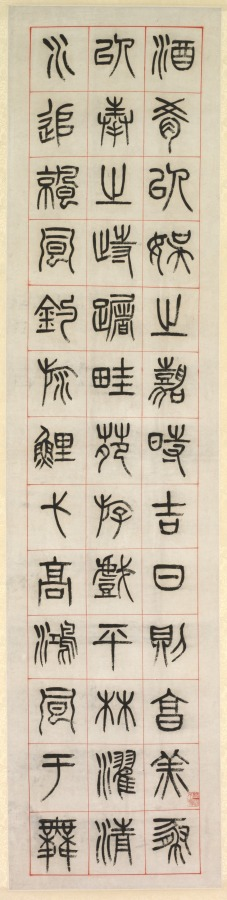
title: On Happiness, Calligraphy in Seal Script Style (zhuanshu)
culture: China, Changsu, Qing dynasty (1644-1911)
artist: Yang Yisun (Chinese, 1813–1881)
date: 1871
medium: hanging scoll, ink on paper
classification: Painting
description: Yang Yisun transcribed this ancient text on six narrow scrolls, starting at the top right and ending at the bottom left. Yang emphasizes the text’s historic nature by using the seal script style found on stone steles and bronze vessels. On Happiness features reflections of a scholar on a leisurely life in the countryside, composed by Han dynasty official Zhongchang Tong, who died the year the Han dynasty collapsed (AD 220). The idyllic life described in the text may bean evocation of the past in a time of national crisis. A decade before Yang wrote these scrolls, Anglo-French forces had looted and burned the Summer Palace in Beijing. At the same time, the domestic Taiping rebellion (1850–64), led by a religious fanatic to overthrow the Qing government, had devastated Yang’s homeland, the Jiangnan region, with an estimated 20 million lives lost.